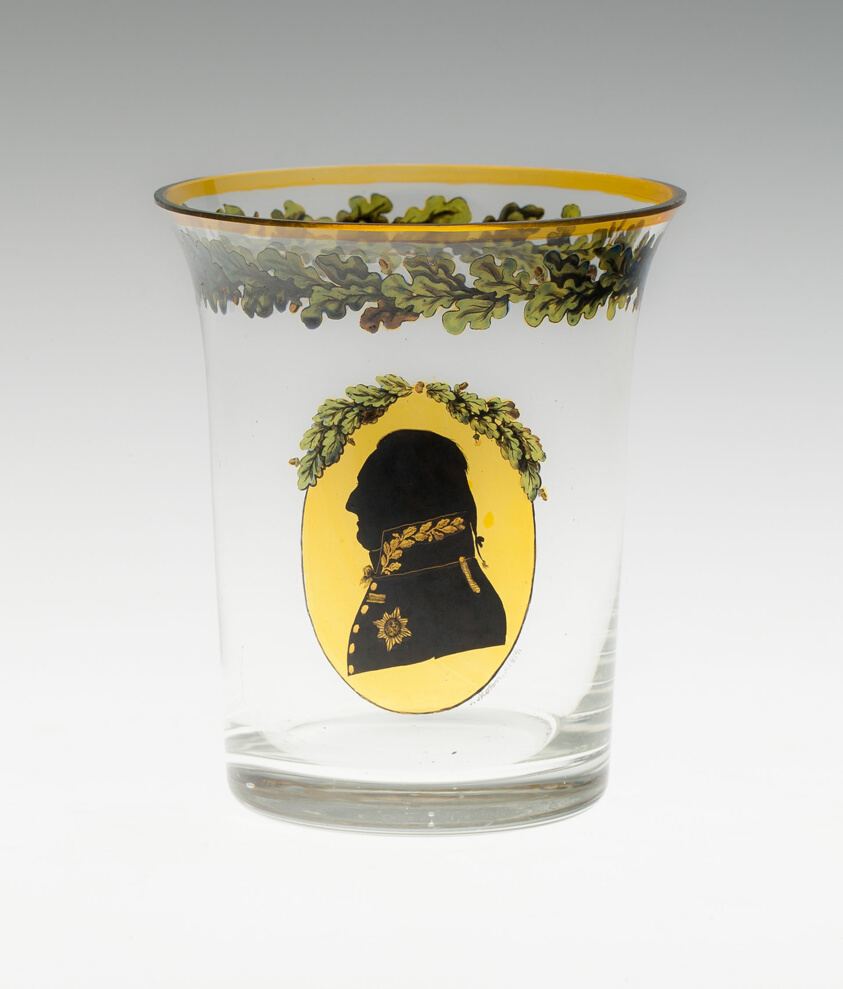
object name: Glass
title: Beaker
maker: Samuel Mohn; German, 1762-1815; Dresden, Germany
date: 1814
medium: Glass; blown, enameled, gold and silver foil decoration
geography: Germany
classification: drinking vessel; glass; european decorative arts